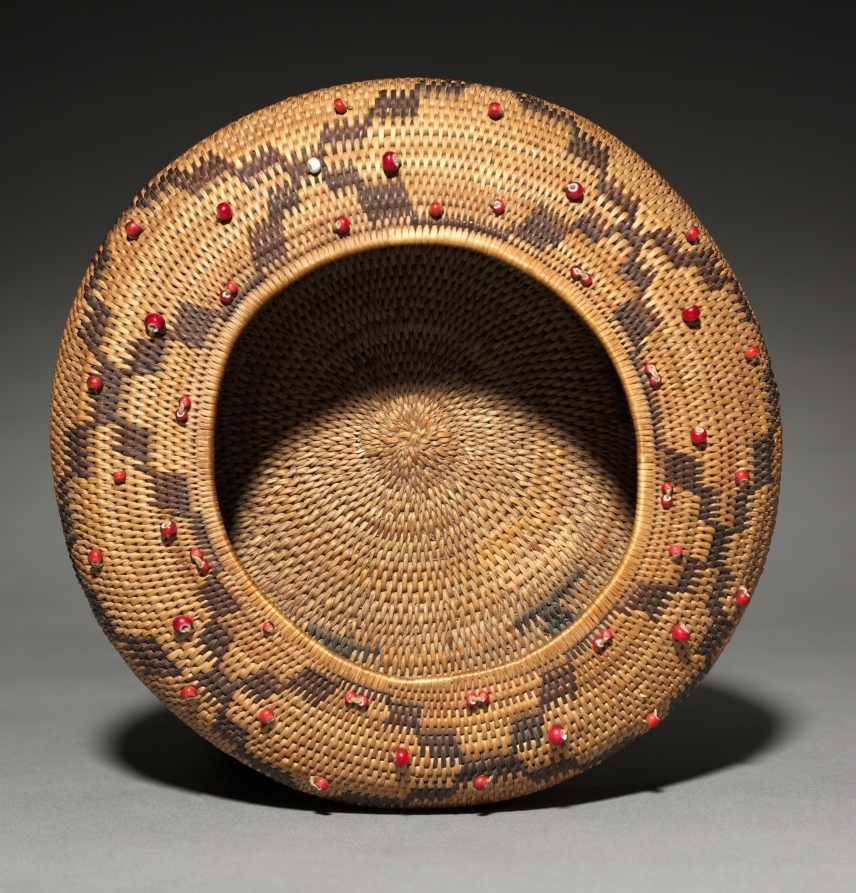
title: Trinket Bowl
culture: California, Pomo, Late 19th- Early 20th century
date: c. 1895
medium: Bulrush, Sedge, with beads; coiled (1 rod)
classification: Basketry